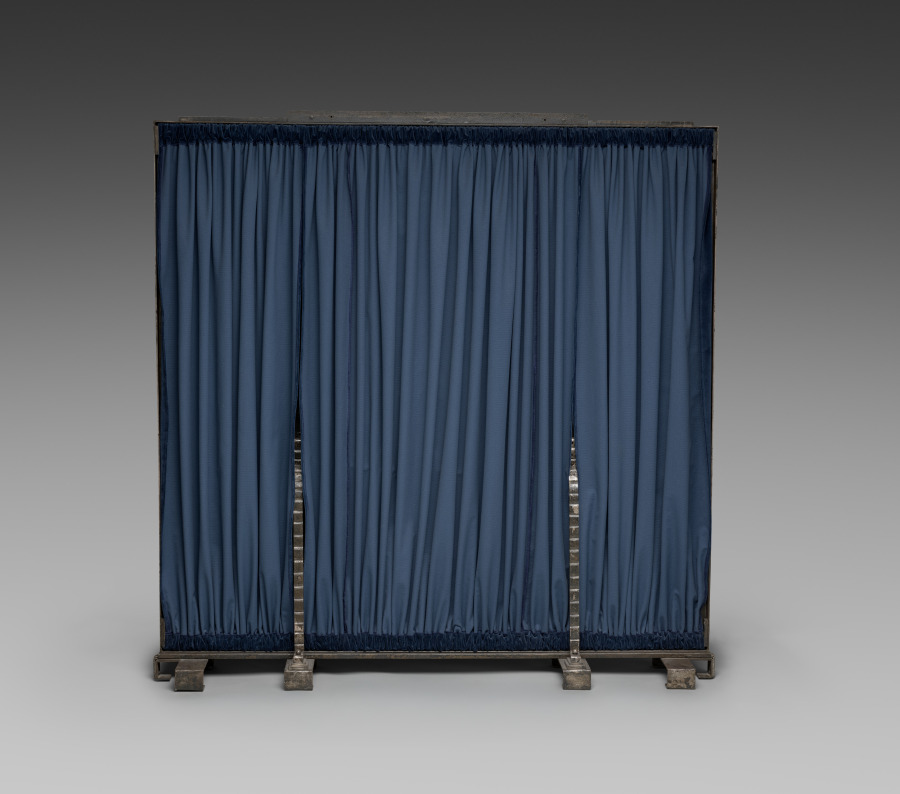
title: Muse with Violin Screen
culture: America, Ohio, Cleveland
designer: Paul Fehér (American, born Hungary, 1898–1990)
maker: Rose Iron Works (America, Ohio, Cleveland, est. 1904)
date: 1930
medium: Steel, brass; silver and gold plating, cotton velveteen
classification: Metalwork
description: Since the early years of the 20th century, the Rose Iron Works, a Cleveland supplier of architectural ornament, has produced distinguished metalwork. The company’s founder, Martin Rose, was born in Austria-Hungary and studied ornamental metalsmithing in Vienna prior to immigrating to Cleveland in 1902. In the 1920s, he hired a talented young Parisian designer, Paul Fehér, to work for the firm. Fehér’s designs, culminating in this massive screen, brought a modern European sensibility to the Rose Iron Works production. With its geometric patterning, highly stylized and abstracted natural forms, and the central figure reminiscent of the celebrated jazz singer Josephine Baker, this screen reflects the classic motifs of Art Deco design.